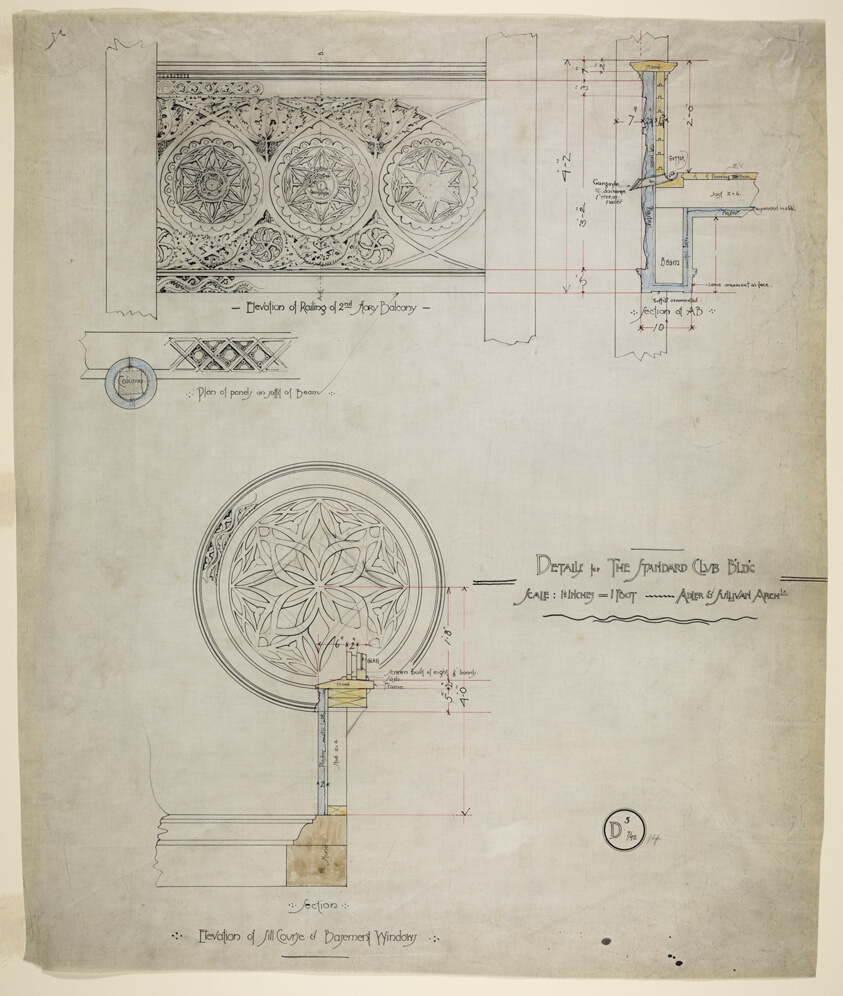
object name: Architectural Drawing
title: Addition and Alterations, Standard Club , Chicago, Illinois, Details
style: 19th century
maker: Adler and Sullivan; American, 1883-1895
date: 1892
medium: Black and red ink with color wash on linen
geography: Michigan Avenue at 24th Street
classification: architectural drawing; architectural working drawing; architecture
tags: Chicago, architecture, buildings